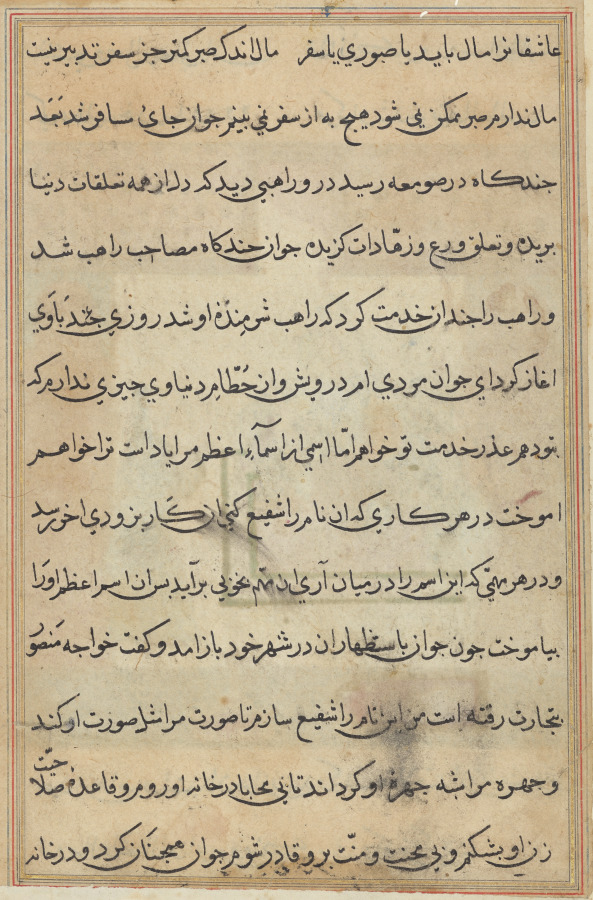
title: Page from Tales of a Parrot (Tuti-nama): text page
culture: Mughal India, court of Akbar (reigned 1556–1605)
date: c. 1560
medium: gum tempera, ink, and gold on paper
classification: Painting